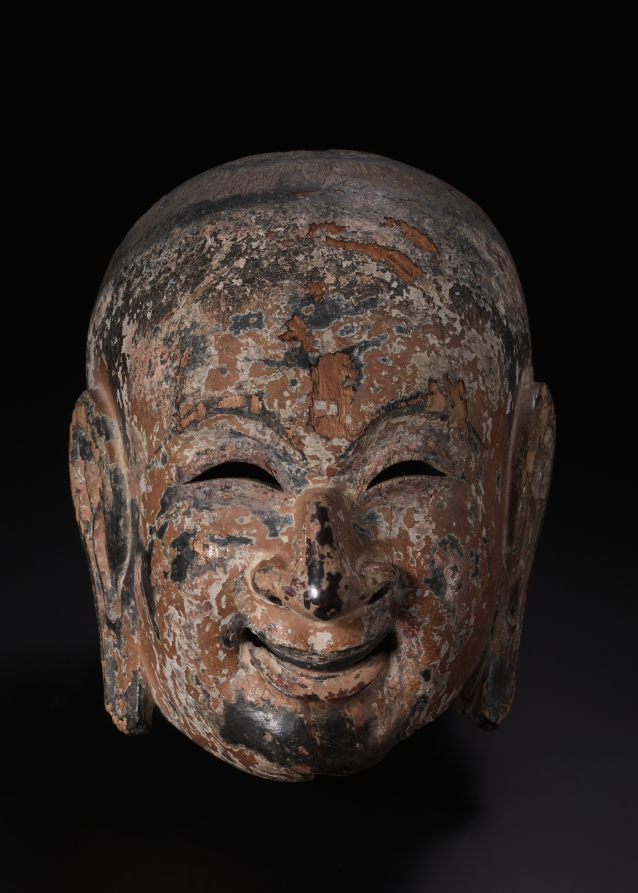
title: Gigaku Mask of Young Persian Boy (Taikōji)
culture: Japan, Nara period (710–94)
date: 710–94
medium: paulownia wood, lacquered and painted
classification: Sculpture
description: This mask is for the role of the son of an old Persian widower in gigaku, a theatrical dance repertoire imported to Japan from continental Asia during the seventh century. The old man and his sons mime prayers to the Buddha. While the mask would cover the entire head of the actor, there are openings for the eyes, nostrils, and mouth.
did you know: This is the mask for one of two sons who accompany a widower in ancient dance theater.